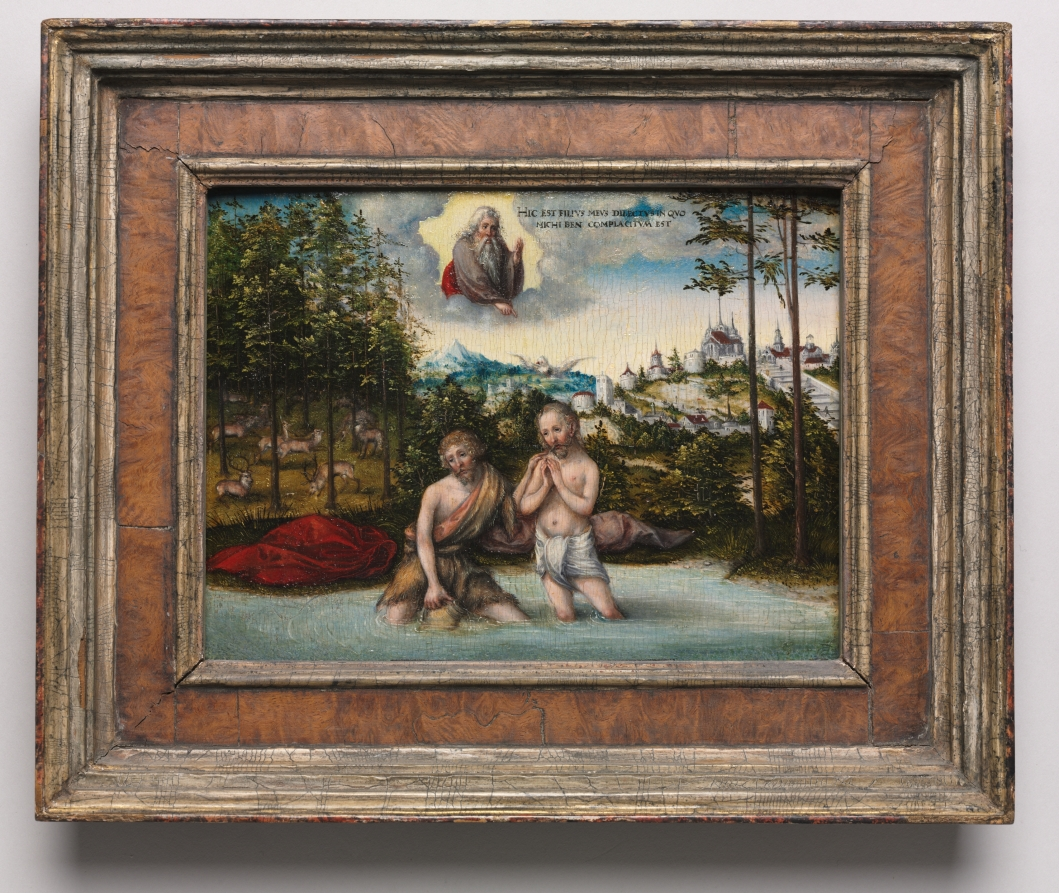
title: The Baptism of Christ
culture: Germany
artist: Lucas Cranach (German, 1472–1553)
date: 1530s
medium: oil on wood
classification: Painting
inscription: Inscribed at top center: HIC EST FILIVS MEVS DILECTVS IN QVO/MICHI BEN COMPLACITVM EST.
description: Painted in minute detail, Cranach’s majestic scene includes elements characteristic of landscapes in 16th-century German art: verdant forest, hilltop city, and distant mountains. A close associate of Protestant reformer Martin Luther, Cranach adapted Christian imagery to reflect Luther’s belief that religious art must narrate scripture. The Gospels describe Christ’s baptism with the heavens opening, a dove descending, and a voice saying, “Here is my beloved son, with whom I am well pleased,” which Cranach painted in Latin directly onto the clouds.